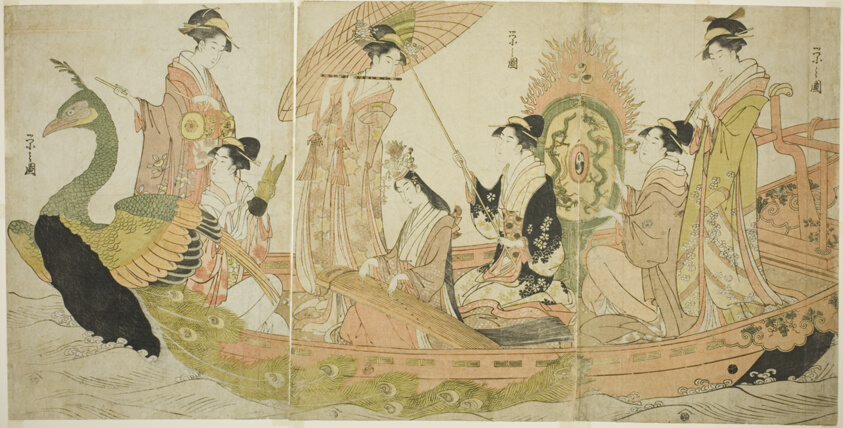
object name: Print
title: The Peacock Boat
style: Japanese (culture or style)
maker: Chobunsai Eishi; Japanese, 1756-1829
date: c. 1795/96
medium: Color woodblock print; oban triptych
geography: Japan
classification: woodblock print; print; asian art